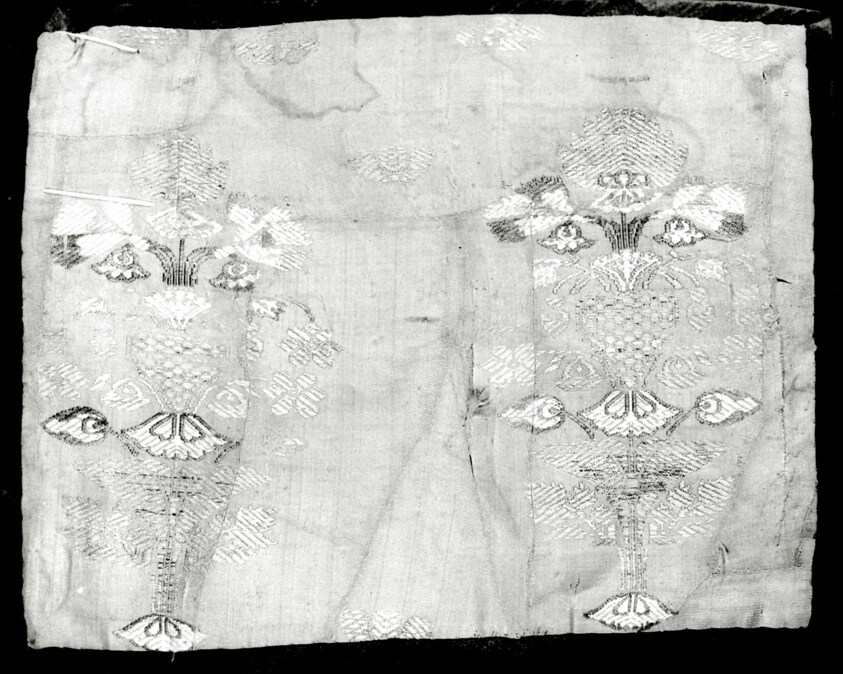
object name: Textile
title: Fragment (Dress Fabric)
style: isfahan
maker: Iran, Isfahan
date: 18th century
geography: Iran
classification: textile; weaving